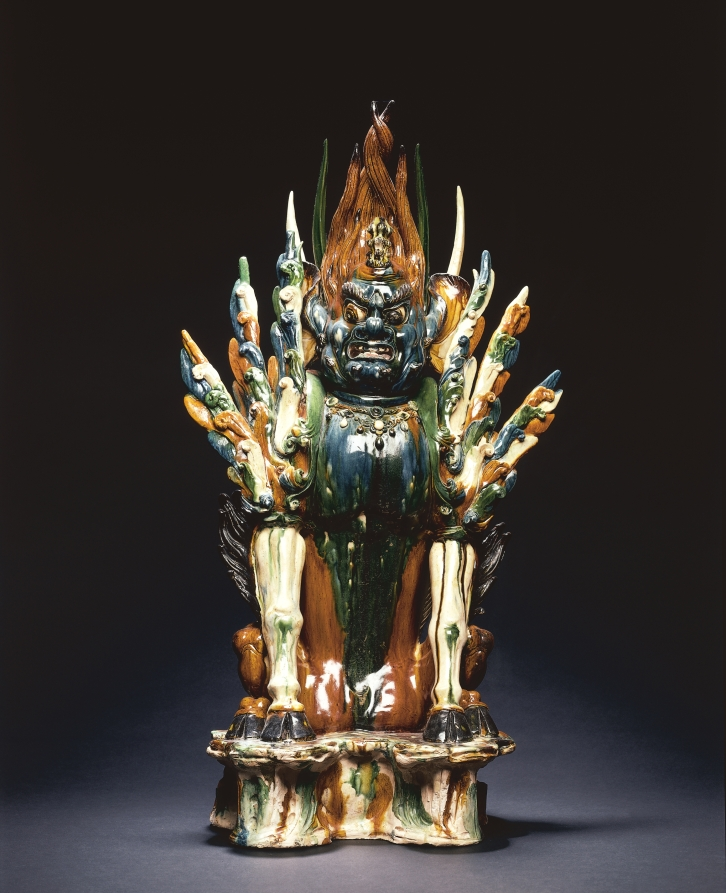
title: Tomb Guardian with Human Face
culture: China, probably Shaanxi province, Xi'an, Tang dynasty (618-907)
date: early 700s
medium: glazed earthenware, sancai (three-color) ware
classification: Ceramic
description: With their fierce expressions and exaggerated physical features, these two fantastic guardian creatures were intended to guard the entrance to a tomb, warding off evil as well as keeping the soul of the deceased from wandering. Known as "earth spirits" or qitou, this one sports a human face with huge protruding ears and a short horn surrounded by fiery, twisting hair; the other has an animal face and a pair of antlers growing above its eyebrows. Their many elongated spikes heighten the fearful intensity. Before tomb sculptures were placed in the tomb, they were carried through the streets in a funerary procession. Funerary gifts provided the deceased with means for the afterlife. They were also an expression of filial piety and demonstrated the wealth and power of the descendants.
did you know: Cobalt blue glaze used on the head and chest was imported from the Middle East.